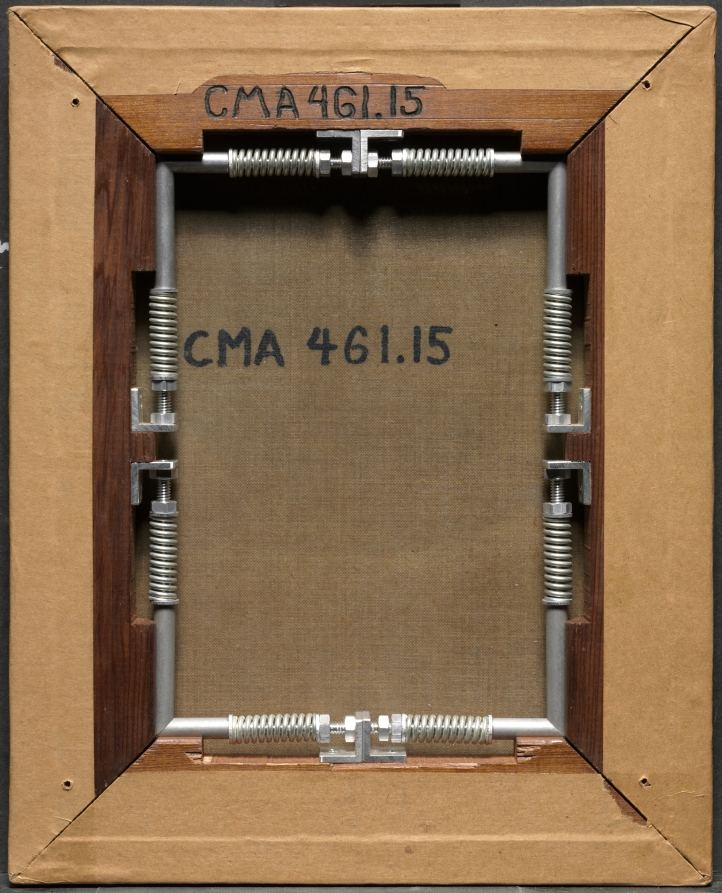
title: Orchid Blossoms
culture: America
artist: Martin Johnson Heade (American, 1819–1904)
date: 1873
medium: oil on canvas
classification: Painting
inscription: signed lower right: M.J. Heade / 1873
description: At the time he created this work, Martin Johnson Heade had made three trips to Central and South America. As an outgrowth of these experiences, he made a large number of paintings of birds and flowers, especially orchids, in a tropical setting.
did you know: Ten years after painting Orchid Blossoms, artist Martin Johnson Heade married at the age of 64.